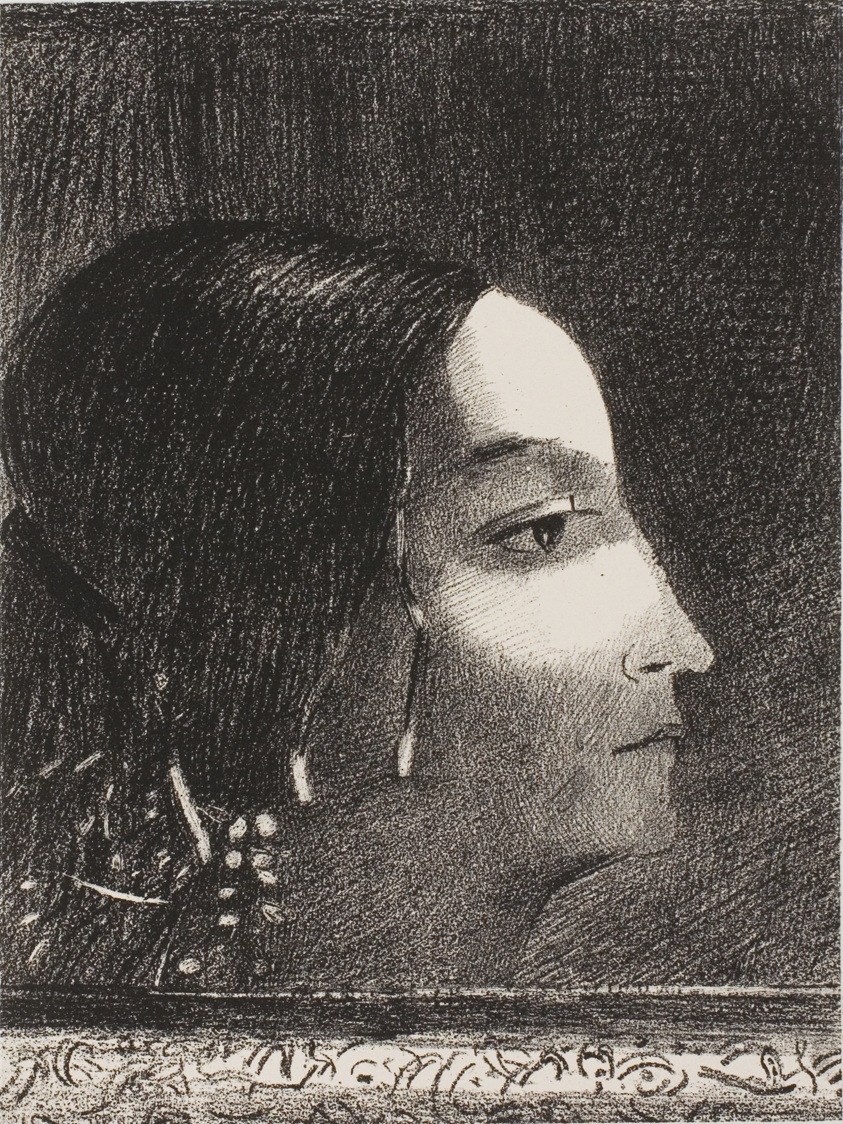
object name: Print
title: Dramatic and Grandiose with Her Face like that of a Druid Priestess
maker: Odilon Redon (French, 1840-1916)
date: 1887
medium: Lithograph in black on ivory China paper, laid down on white wove paper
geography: France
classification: lithograph; print; prints and drawing; paper